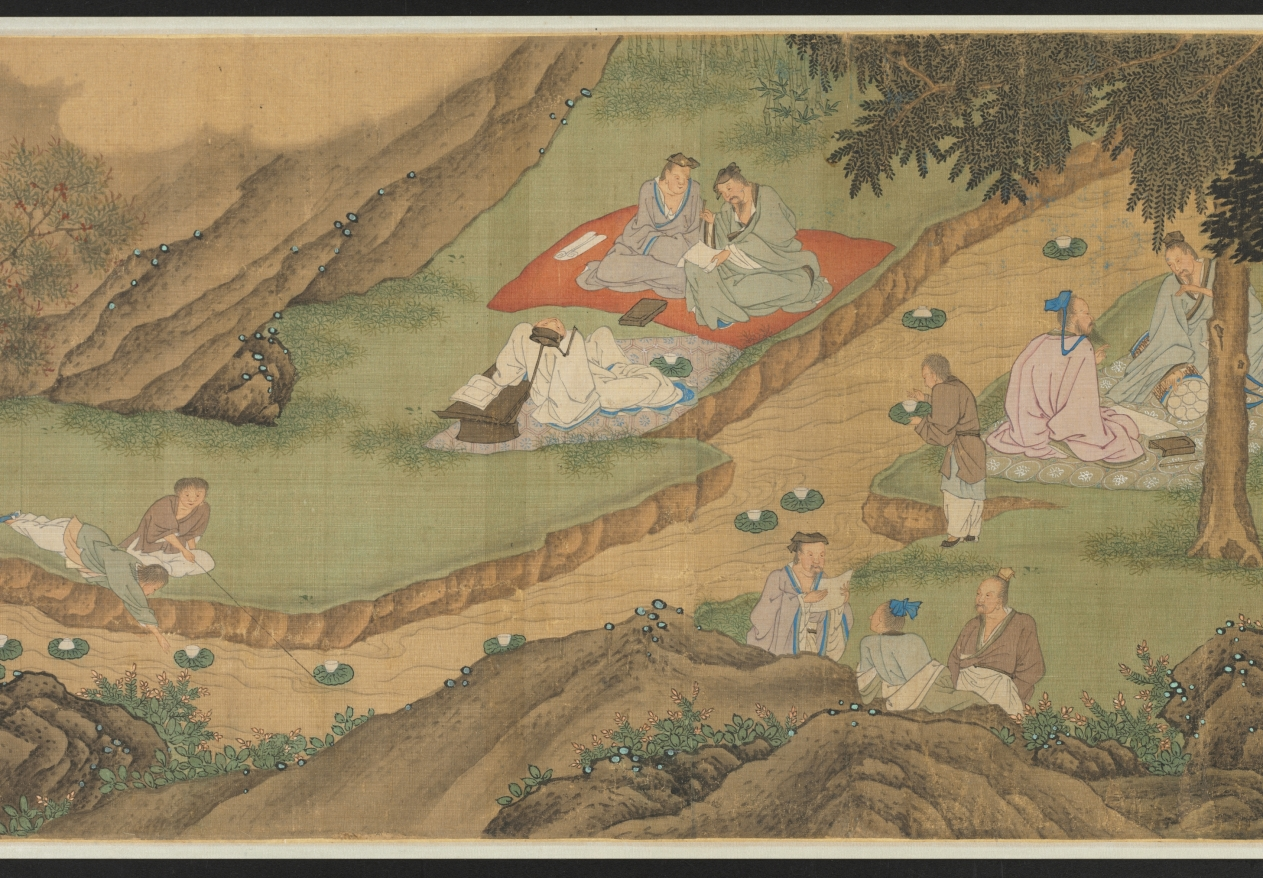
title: Purification at the Orchid Pavilion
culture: China, Qing dynasty (1644-1911)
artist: Fan Yi (Chinese, c. 1615–before 1688)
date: 1671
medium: Handscroll; ink and color on silk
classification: Painting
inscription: Artist's inscription, signature, and 2 seals: Painted by Fan Yi of Zhongfu during the second month of winter of the xinhai year [1671]. [2 seals] Fan Yi zhi yin, Zi yu yi.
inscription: Title on the frontispiece by Monk Yueshan (1629-1709).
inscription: 3 colophons and 13 additional seals: 1 colophon, dated 1707, and 6 seals of Yueshan; 2 colophons and 3 seals of Wong Kwan-Shut (Huang Junshi) 黃君實 (b. 1934); 2 seals of Fu Shen 傅 申 (b. 1937); 2 seals of Tessai Tomioka 富岡鐵齋 (1836-1924).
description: By the 1600s, the historic gathering at Lanting, Zhejiang province, in 353 CE was a common theme in Chinese painting. Originally based on a composition attributed to Li Gonglin (1049– 1106), now lost, Wu school artists revived the theme. Fan Yi, the brother of the artist Fan Qi from Nanjing, used delicate brushwork and luminous colors to depict the spring gathering.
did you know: The gathering’s host is in the Orchid Pavilion at the end of the scroll, representing an episode known as “Wang Xizhi Watching the Geese 王羲之觀鵝圖.”